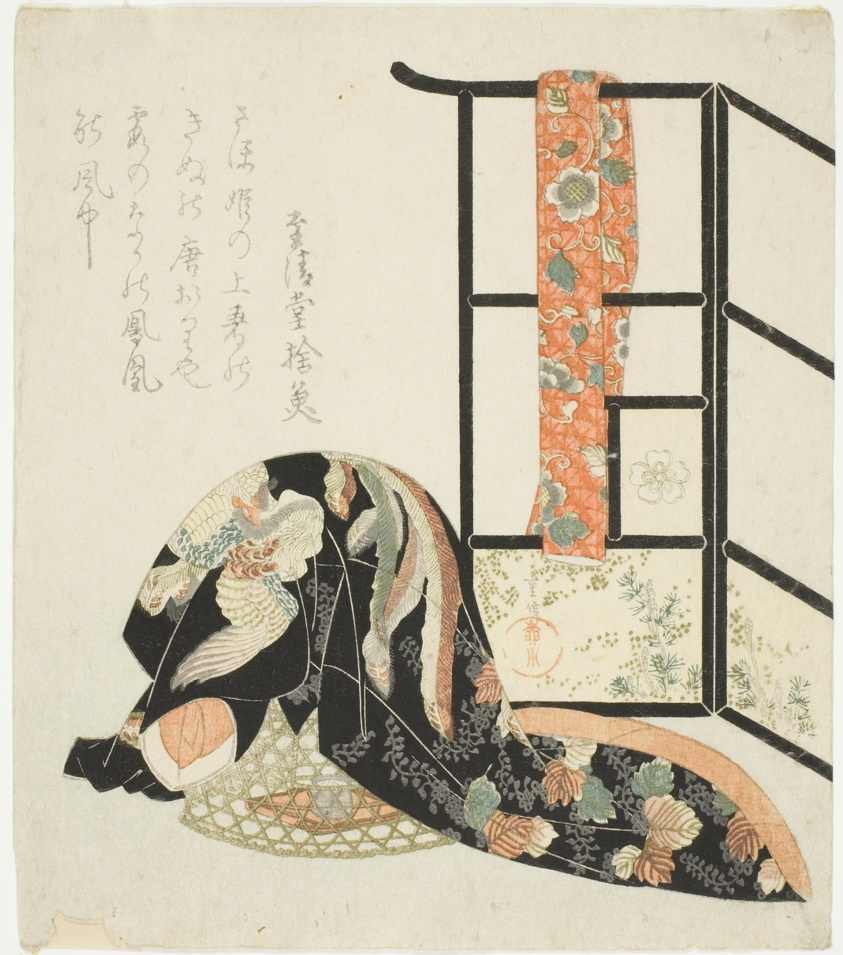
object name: Print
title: Scenting a kimono with incense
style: Japanese (culture or style)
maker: Yanagawa Shigenobu I (Japanese, 1787–1832)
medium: Color woodblock print; shikishiban, surimono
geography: Japan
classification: woodblock print; print; asian art